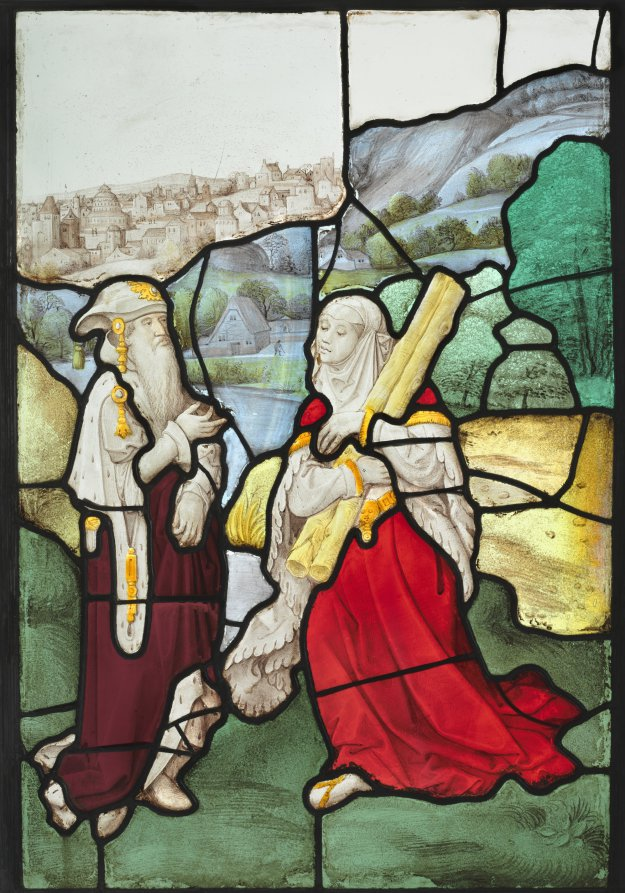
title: Elijah and the Widow of Zarephath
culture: North Netherlands, 16th century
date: c. 1525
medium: pot-metal and white glass, and silver stain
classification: Glass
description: As told in I Kings 17:8–24, in the city of Zarephath the prophet Elijah met a widow gathering sticks who gave him food and drink. The widow's son was mortally ill and Elijah carried him upstairs where he "stretched himself upon the child three times" and called upon God. The child was revived.